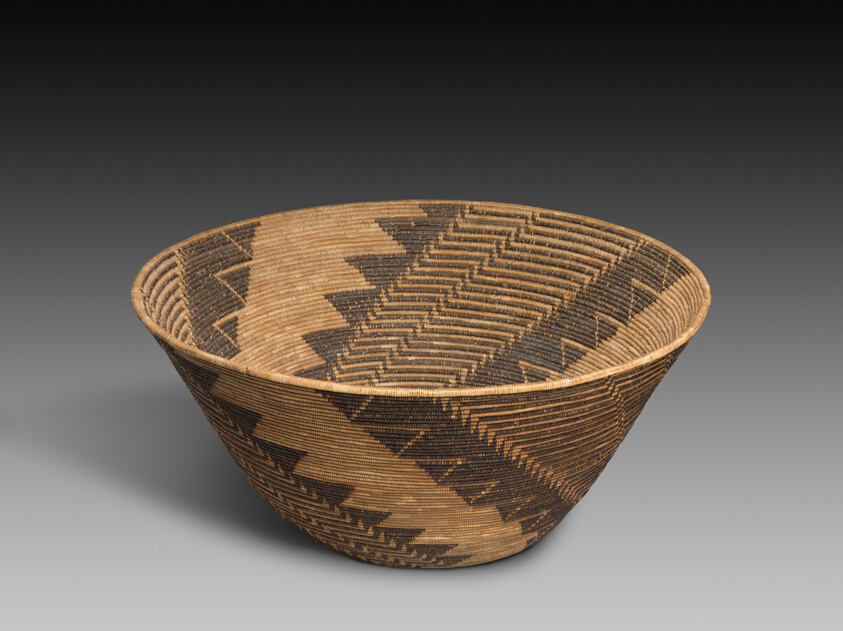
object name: Basketry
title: Food Basket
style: maidu, native american, northern california, americas, native north american, Arts of the Americas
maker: The mother of Salena Jackson; Maidu, active late 19th/early 20th century; Near Susanville, northern California, United States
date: 1870–90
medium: Plant fibers and pigment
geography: Northern California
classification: basketry; art of the americas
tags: basketry, baskets, storage, zigzags, geometric, feast